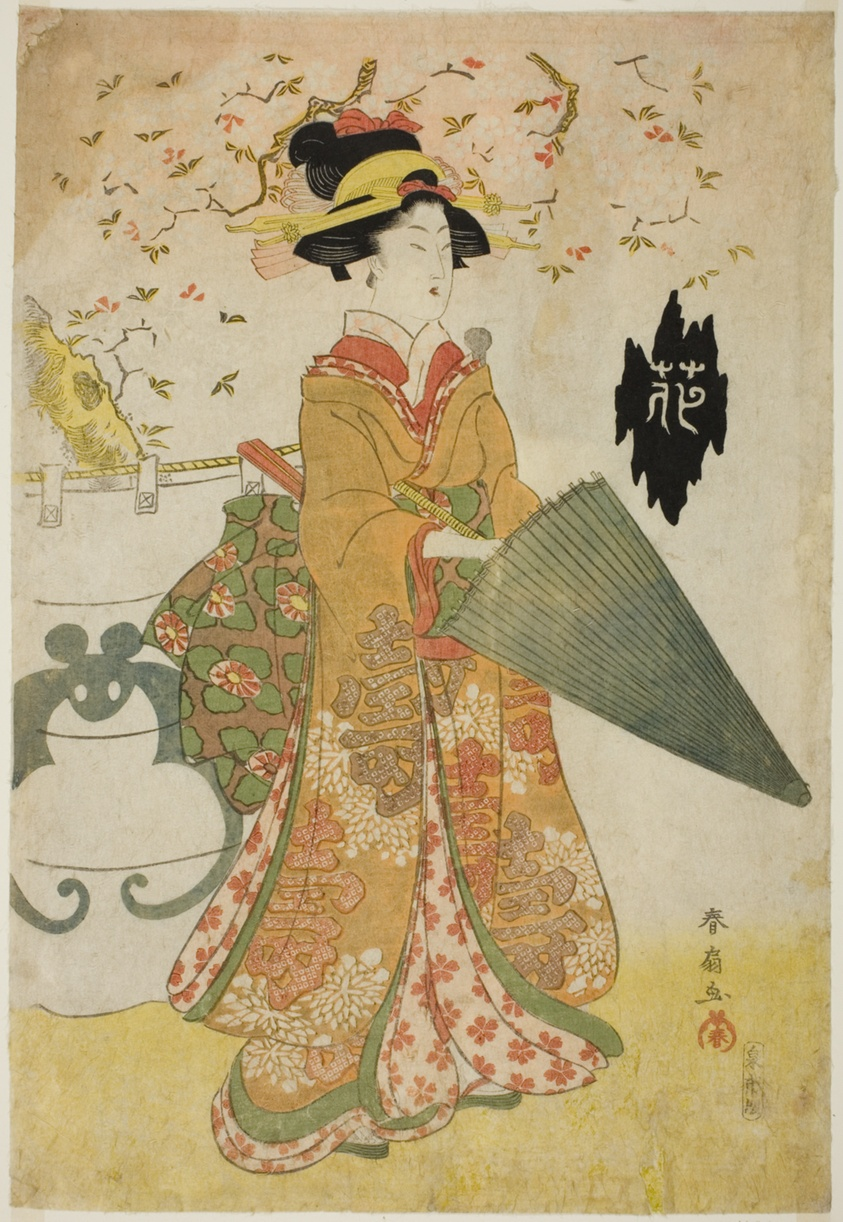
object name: Print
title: Flower (Hana)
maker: Katsukawa Shunsen (Shunko II) (Japanese, 1762-c. 1830)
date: early 19th century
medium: Color woodblock print; oban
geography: Japan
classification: woodblock print; print; asian art